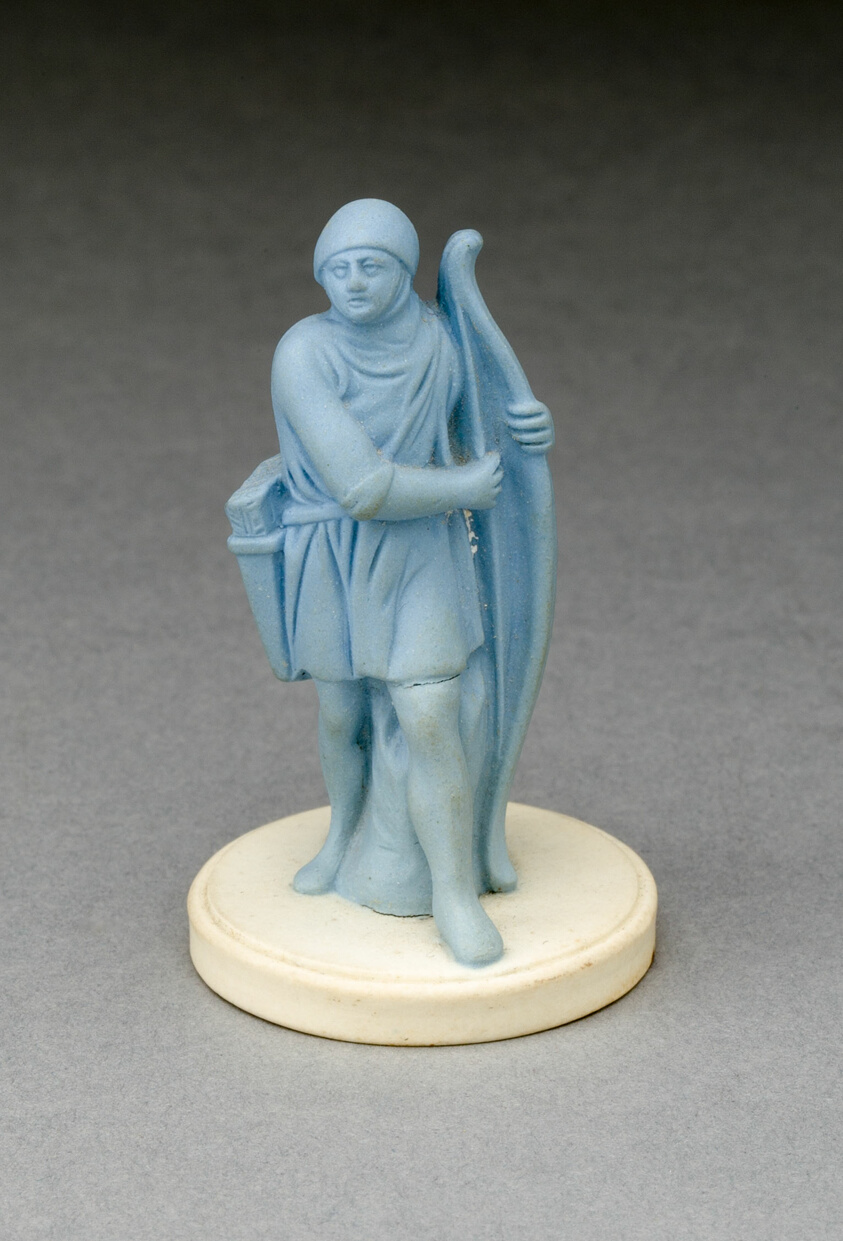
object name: Ceramics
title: Chess Piece: Pawn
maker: Wedgwood Manufactory (England, founded 1759)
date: 19th century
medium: Stoneware (jasperware)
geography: Burslem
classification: accessories (object genre); stoneware; european decorative arts; ceramics